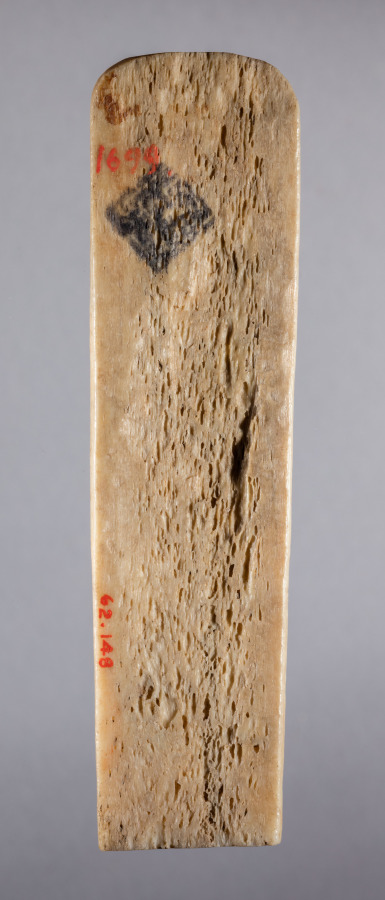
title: Figurine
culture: Iran, early Islamic period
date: 700s - 900s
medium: bone, incised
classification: Miscellaneous